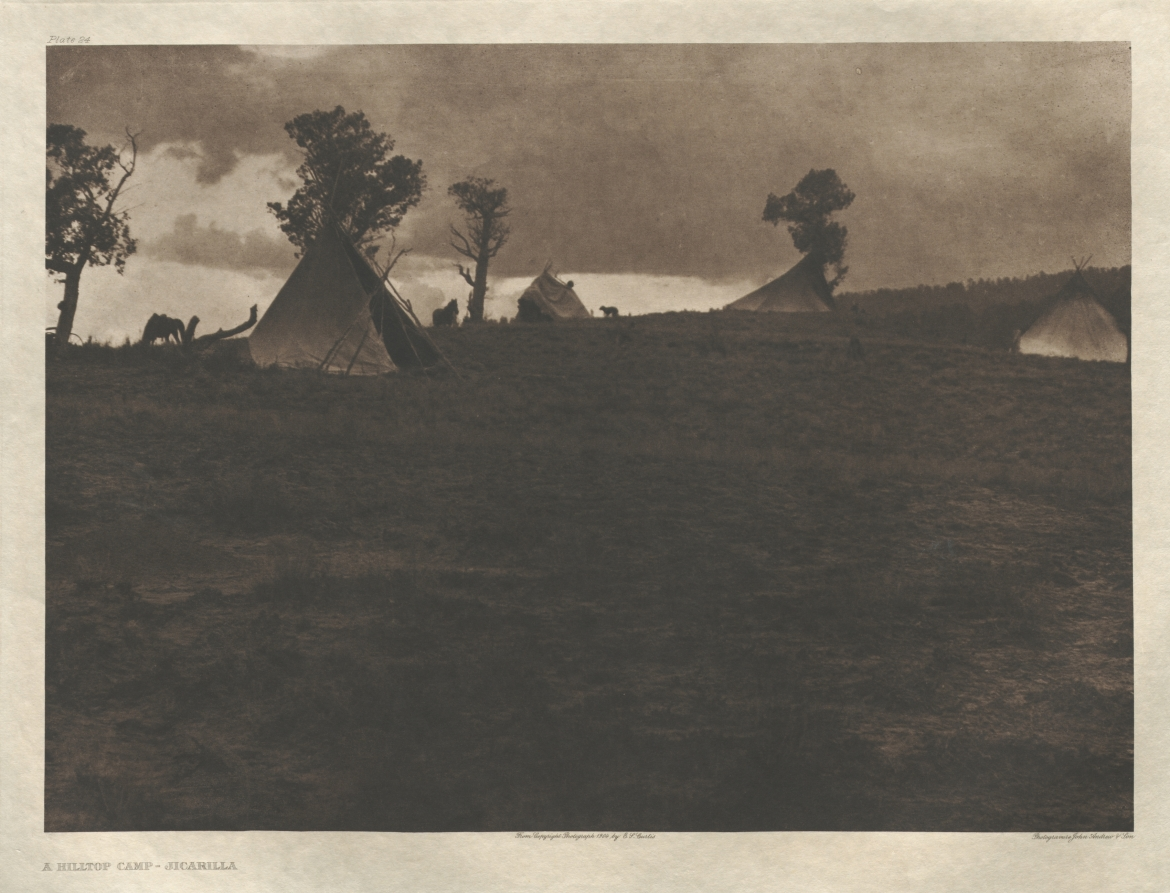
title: Portfolio I, Plate 24: A Hilltop Camp-Jicarilla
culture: America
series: The North American Indian: being a series of Portfolios picturing and describing the Indians of the United States, the Dominion of Canada, and Alaska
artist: Edward S. Curtis (American, 1868–1952)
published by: The University Press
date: 1904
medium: photogravure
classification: Portfolio